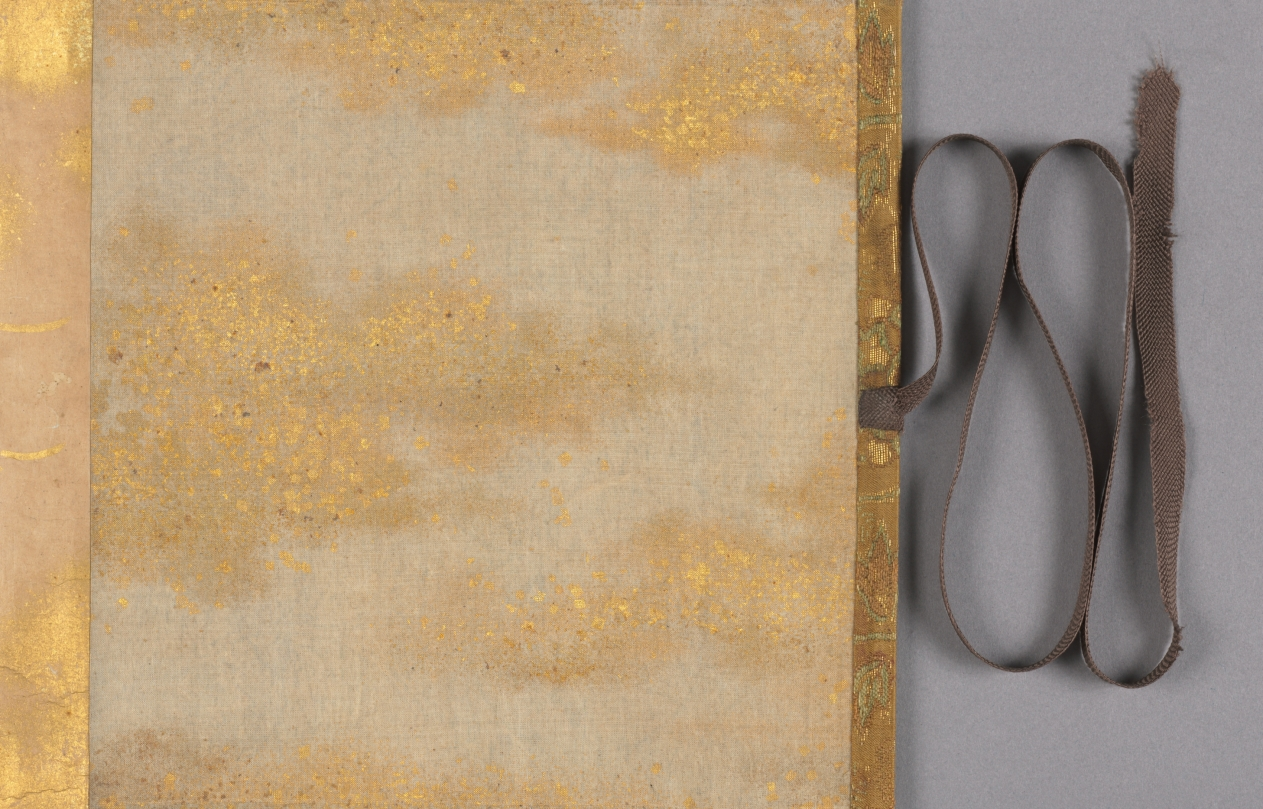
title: Eight Views of Xiao-Xiang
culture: Japan, Muromachi period (1392–1573)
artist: Sesson Shūkei (Japanese, c. 1492–c. 1577)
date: 1500s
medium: handscroll; ink on paper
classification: Painting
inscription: Signature and seal of artist at end of painting.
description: Eight Views of the Xiao and Xiang Rivers can be traced to 11th-century Chinese poems and paintings, the depiction of which had also become popular among Korean and Japanese painters. Xiao-Xiang refers to the region in present-day Hunan province where the Xiao and Xiang rivers converge. Few painters of the Eight Views had in fact seen the scenery; rather, they were trying to portray in ink and wash the lyrical qualities of dim light and a misty atmosphere typical of that region. Each of the poetic titles suggests a time of day, a season, or specific atmospheric conditions—subjects that challenged the abilities of the most talented artists. In this miniature painting (shukuzu) of the Muromachi period, Japanese Zen monk and painter Shukei Sesson depicted all eight views featured in Chinese prototypes: Wild Geese Descending to Sandbar; Returning Sails Off a Distant Coast; Mountain Market in Clearing Mist; River and Sky in Evening Snow; Autumn Moon over Dongting Lake; Night Rain on the Xiao and Xiang; Evening Bell from Mist-Shrouded Temple; and Fishing Village in Evening Glow.